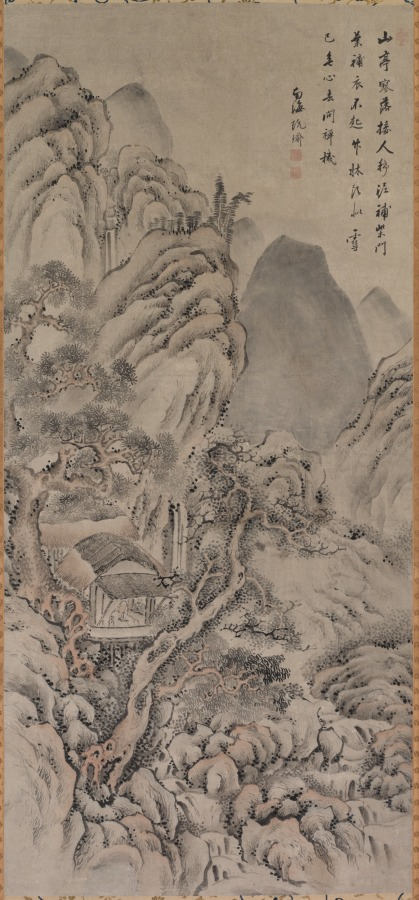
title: Landscape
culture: Japan, Edo period (1615–1868)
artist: Gion Nankai (Japanese, 1677–1751)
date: c. 1700–1751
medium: hanging scroll; ink and color on paper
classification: Painting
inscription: artist's inscription, signature and two seals at upper right corner.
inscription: The mountain pavilion is desolate, visitors are rare./ Mud patches the brushwood gate; leaves patch my clothes./ Rising not from the bamboo bed, my head like snow./ Already without intent, I abandon questions of Zen.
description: A teacher of Confucian ethics, the Chinese philosophical system focused on social harmony and familial responsibility, Gion Nankai was also a painter. Ike Taiga (池大雅) (1723–1776) was among his students. Nankai inscribed this landscape with one of 24 poems for painting subjects composed by the scholar and painter Tang Yin (唐寅) (Chinese, 1470–1524). It reads as follows: The mountain pavilion is desolate, visitors are rare. Mud patches the brushwood gate; leaves patch my clothes. Rising not from the bamboo bed, my head like snow. Already without intent, I abandon questions of Zen.